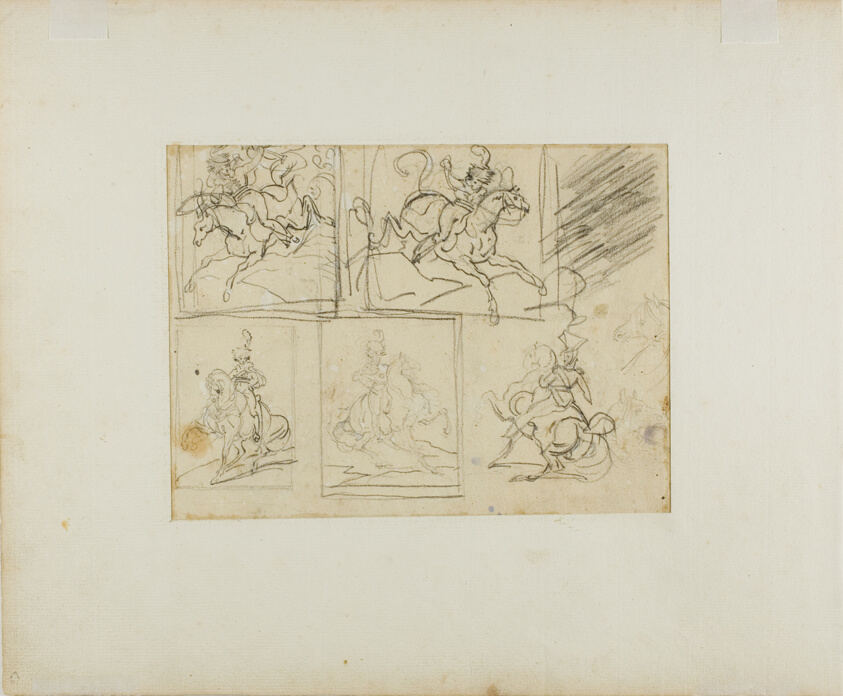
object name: Drawing and Watercolor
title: Four Sketches of a Mounted Trumpeter, and a Polish Lancer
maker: Jean Louis André Théodore Géricault (French, 1791-1824)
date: 1813/14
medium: Black crayon with graphite on tan wove paper, perimeter mounted on ivory laid paper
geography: France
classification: drawings (visual works); prints and drawing